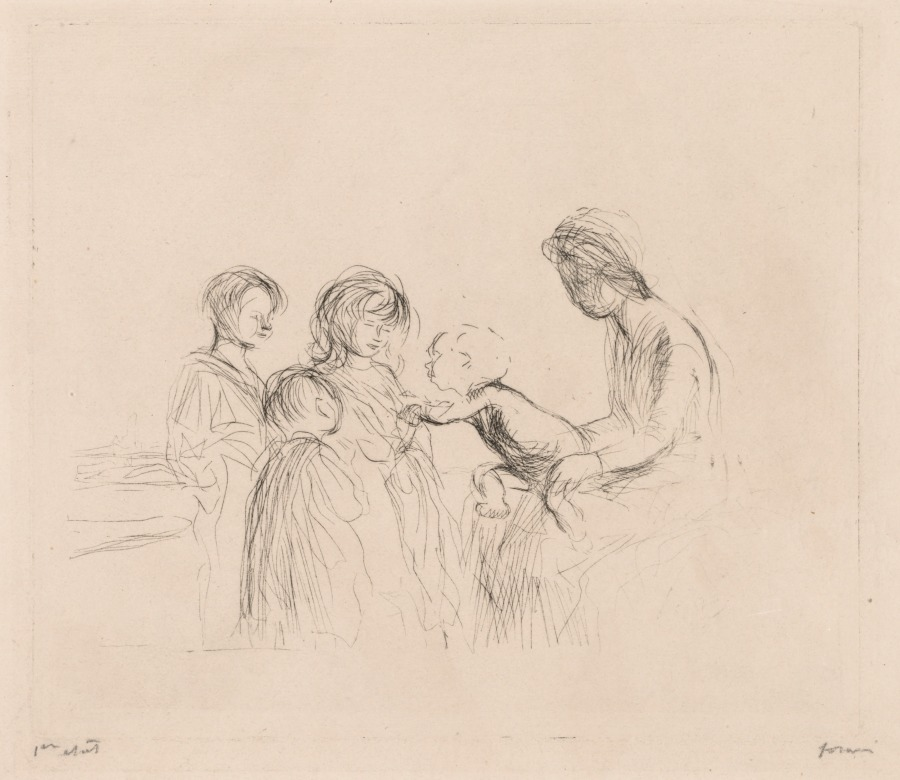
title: Madonna and Children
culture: France, 18th-19th century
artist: Jean Louis Forain (French, 1852–1931)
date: 1909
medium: drypoint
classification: Print